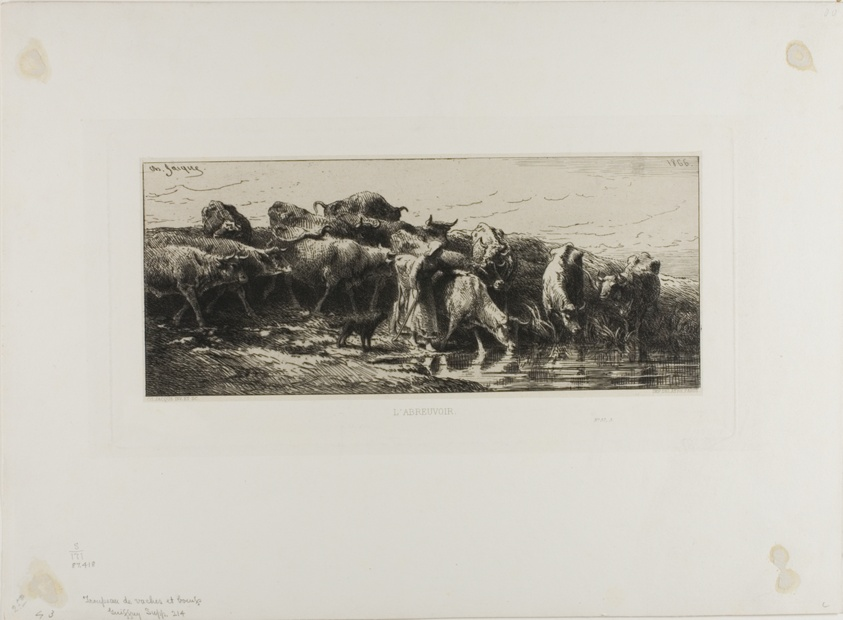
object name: Print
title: Cows Drinking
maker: Charles Émile Jacque (French, 1813-1894)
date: 1866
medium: Etching and drypoint on China paper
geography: France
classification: etching; print; prints and drawing